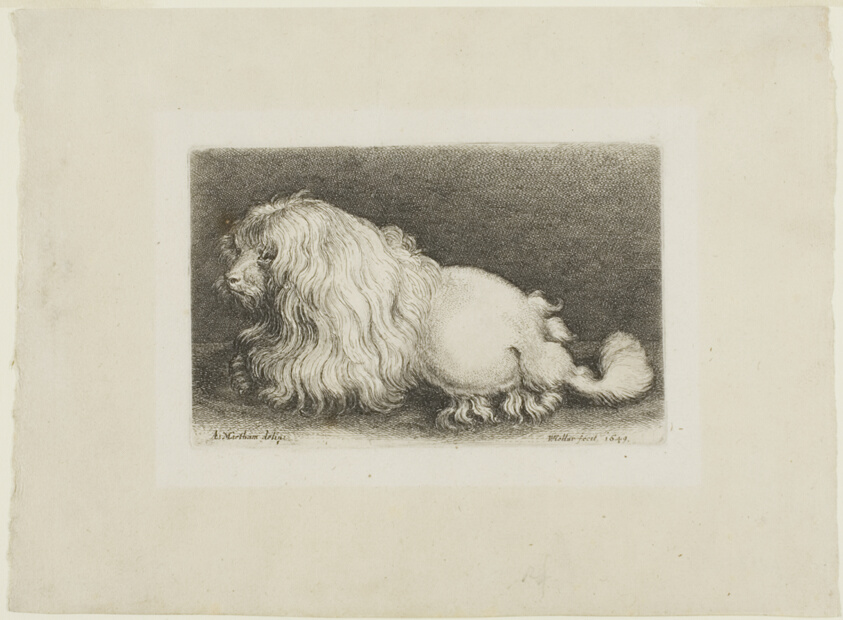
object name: Print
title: White Dog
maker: Wenceslaus Hollar (Bohemian, 1607-1677); after Adriaen Jacobz Matham (Dutch, 1599-1660)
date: 1649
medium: Etching on ivory laid paper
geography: Bohemia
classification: engraving; print; prints and drawing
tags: dogs, animals